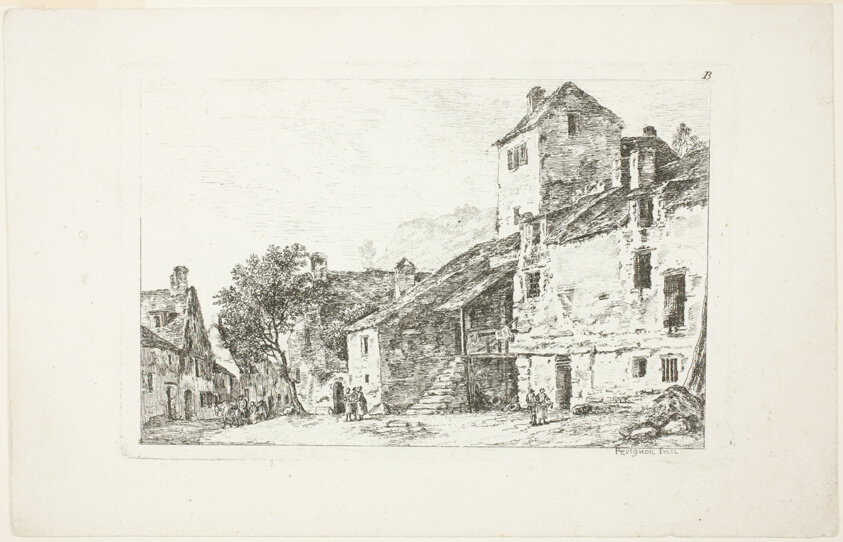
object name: Print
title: Landscape, from Deuxieme Cahier de Paysage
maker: Nicolas Pérignon (French, 1726-1782)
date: 1772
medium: Etching on off-white laid paper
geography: France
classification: etching; paper; print; prints and drawing